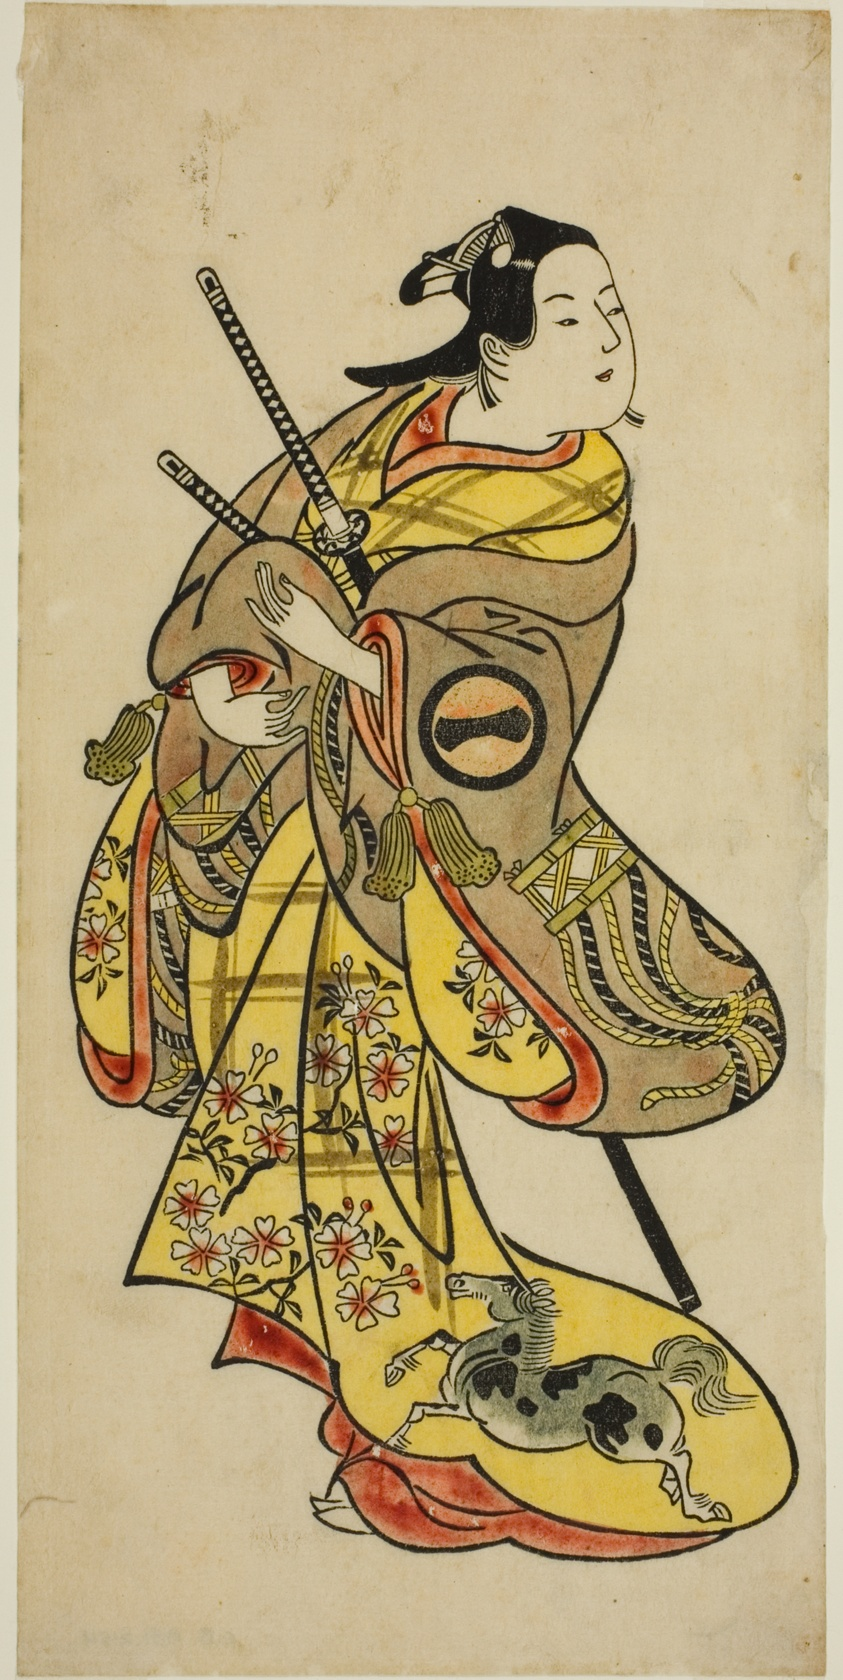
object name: Print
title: The Actor Ichikawa Monnosuke I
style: Japanese (culture or style)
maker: Attributed to Okumura Toshinobu; Japanese, active c. 1717-50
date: c. 1719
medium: Hand-colored woodblock print; hosoban, beni-e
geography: Japan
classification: woodblock print; print; asian art